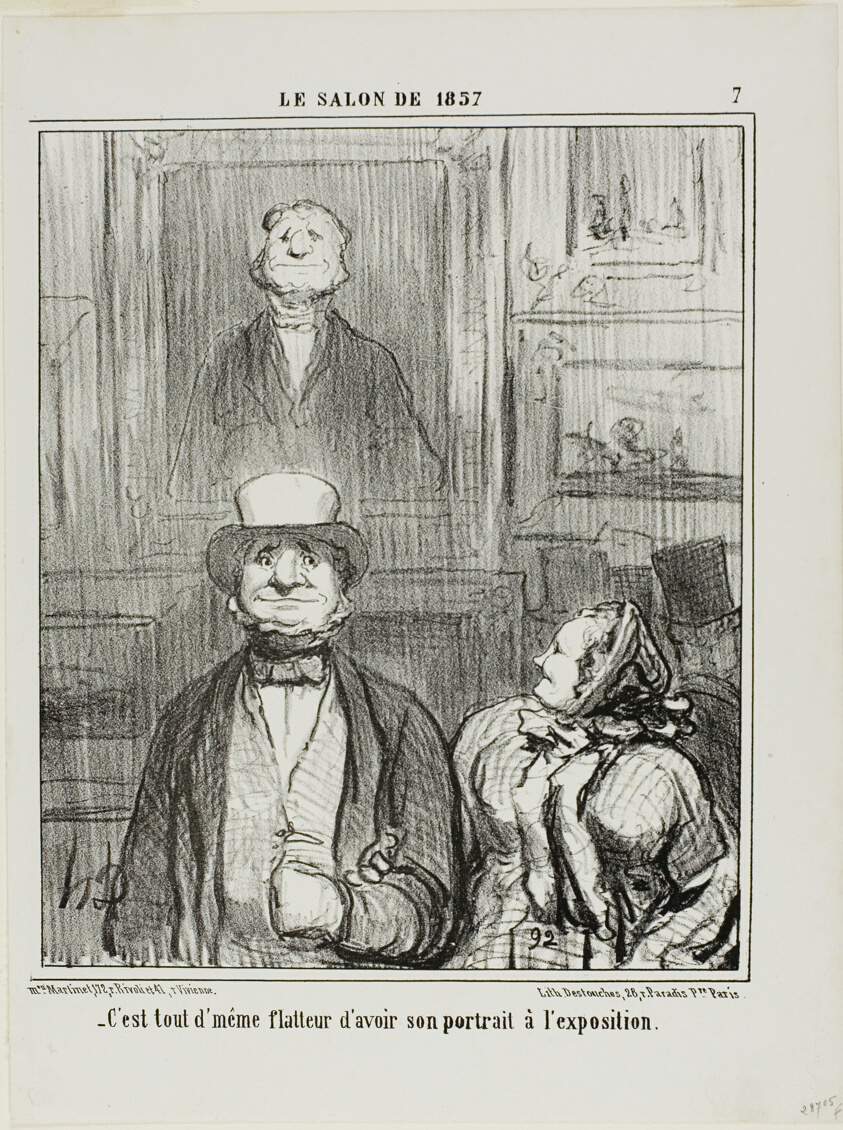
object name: Print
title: “- It's really quite flattering to have one's portrait exhibited at the Salon,” plate 7 from Le Salon de 1857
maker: Honoré Victorin Daumier; French, 1808-1879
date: 1857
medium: Lithograph in black on white wove paper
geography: France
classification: lithograph; print; prints and drawing